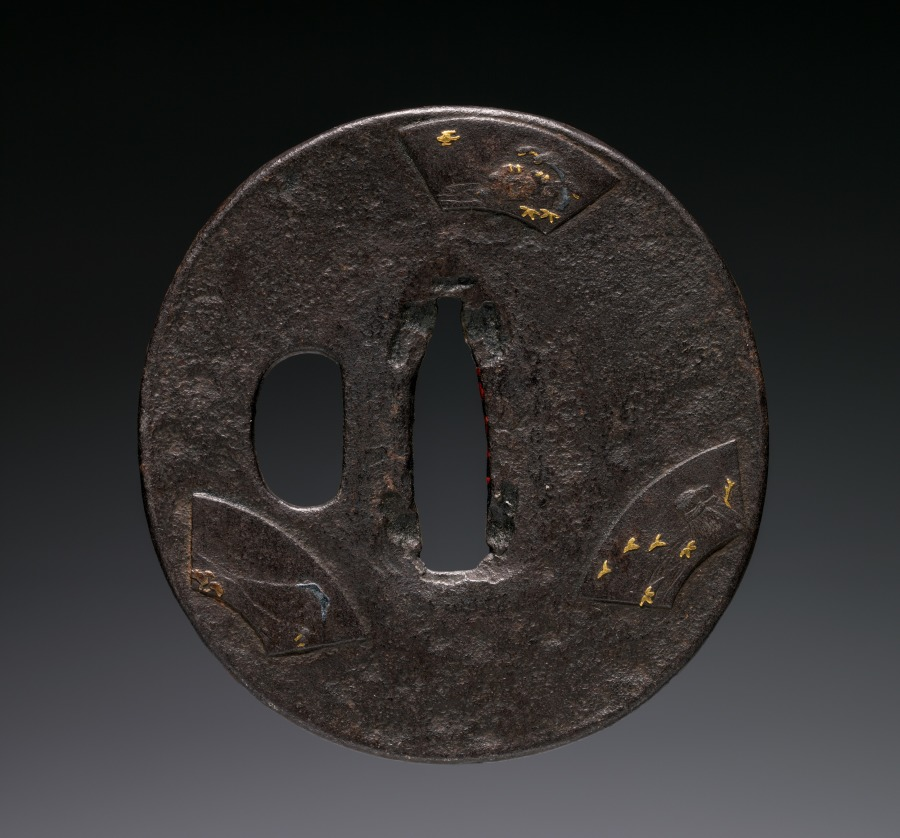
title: Sword Guard (Tsuba) with Scattered Fans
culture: Japan, possibly Edo period (1615-1868)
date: c. 1615–1868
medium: iron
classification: Arms and Armor